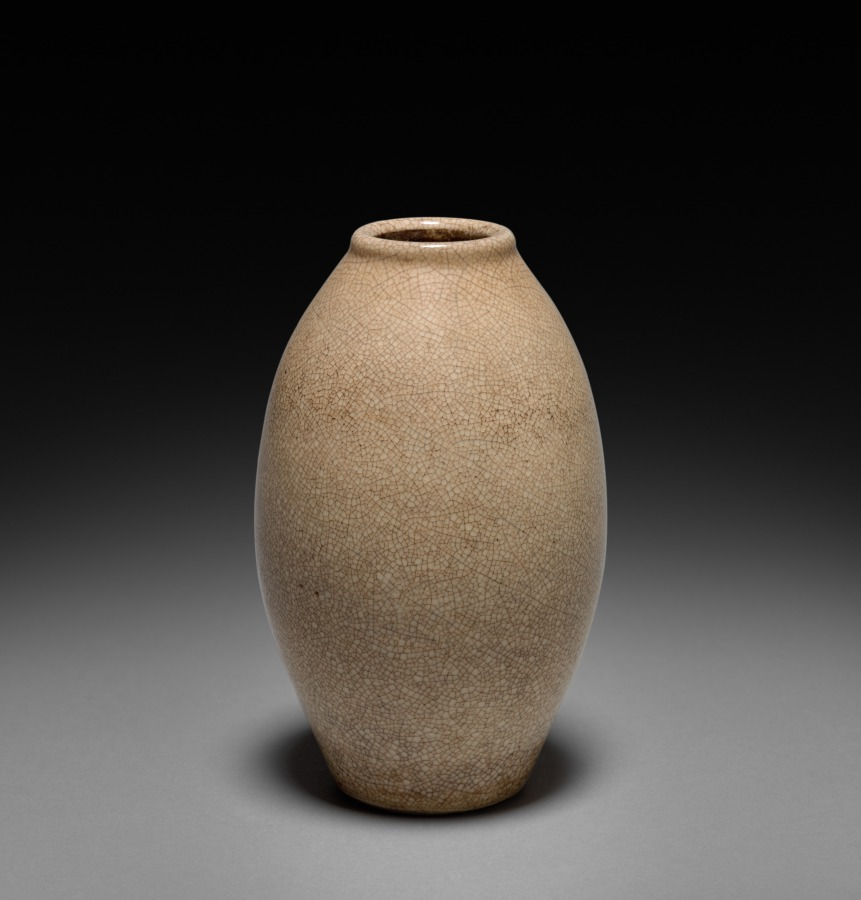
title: Vase: Dhong-ke Ware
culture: China, Ming dynasty (1368–1644)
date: 1368–1644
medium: white crackled stoneware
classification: Ceramic